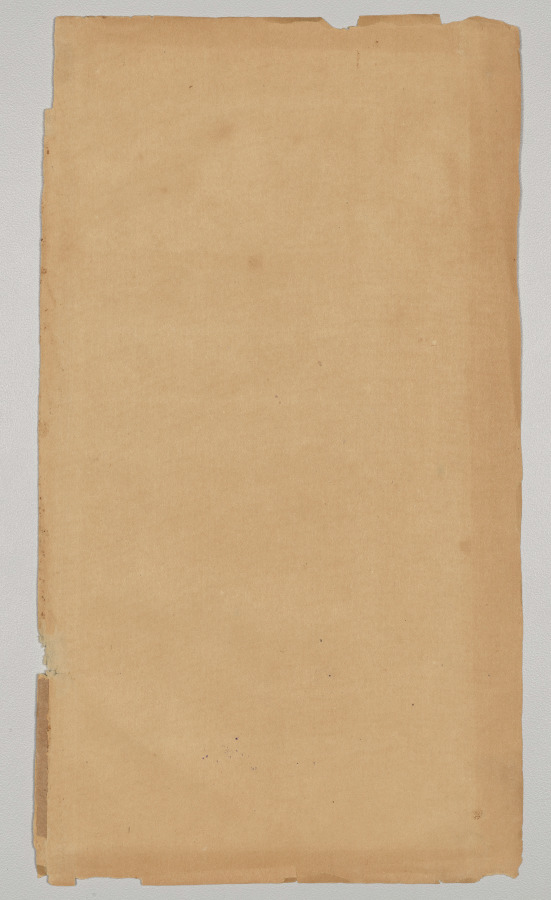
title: Text page from a Mirror of Holiness (Mir’at al-quds) of Father Jerome Xavier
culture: Mughal India, Allahabad, made for Prince Salim (1569–1627)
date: 1602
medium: Ink and gold on paper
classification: Manuscript